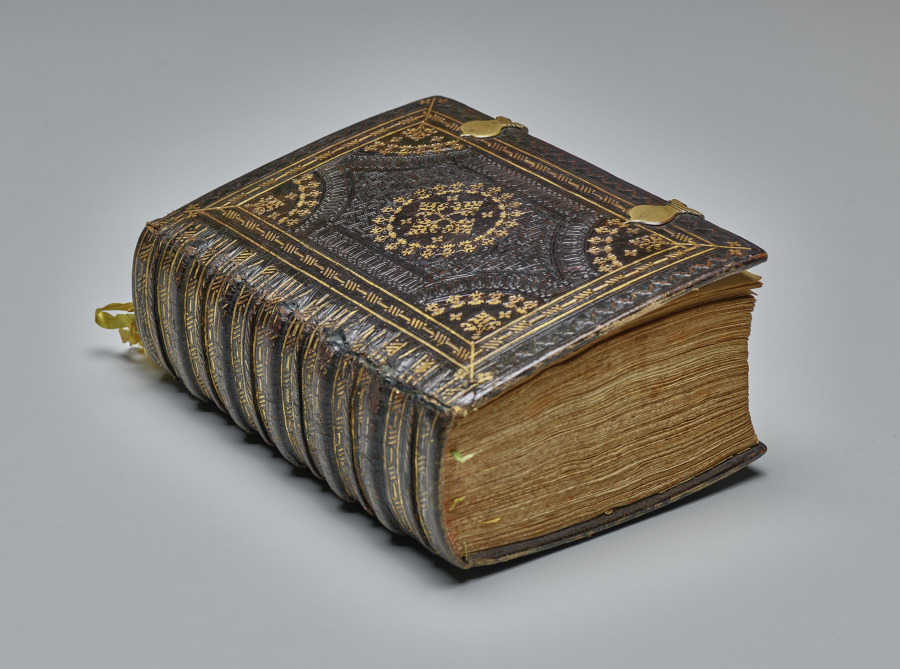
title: Hours of Charles the Noble, King of Navarre (1361-1425)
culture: France, Paris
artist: Master of the Brussels Initials and Associates (French)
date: c. 1404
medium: ink, tempera, and gold on vellum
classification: Bound Volume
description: Creating a book of hours was an arduous and costly process. These books were made from vellum, animal skins that were laboriously prepared in a multistep process. The texts were written with a quill pen and the illustrations were hand painted using water-based pigments. Gold was added for a look of great luxury. Such a book would take years to create, making these valuable objects unique.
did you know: King Charles the Noble likely used this book of hours at his royal castle of Olite in Navarra in northern Spain.